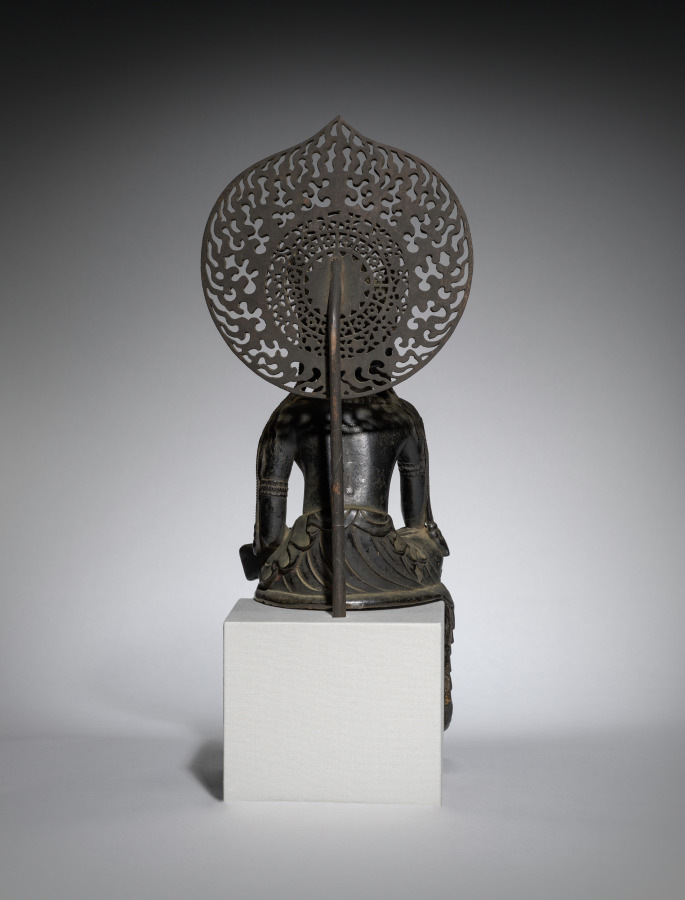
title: Buddha of the Future (Miroku Bosatsu)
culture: Japan, Asuka period (538–710)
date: late 600s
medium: cast bronze, incised, with traces of gilding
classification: Sculpture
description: Buddhism was introduced to Japan in the sixth century. For early Japanese devotees, Buddhism offered the promise of salvation through faith in the Buddha of the Future, who would appear at the end of the world. The concept of eternal salvation held particular resonance with the Japanese aristocracy, who became the staunchest supporters of this new faith. Small sculptures like this one, with its gentle grace and powerful presence, were popular devotional objects.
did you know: The Sanskrit name of this being, Maitreya, derives from the Sanskrit word for friend, mita.